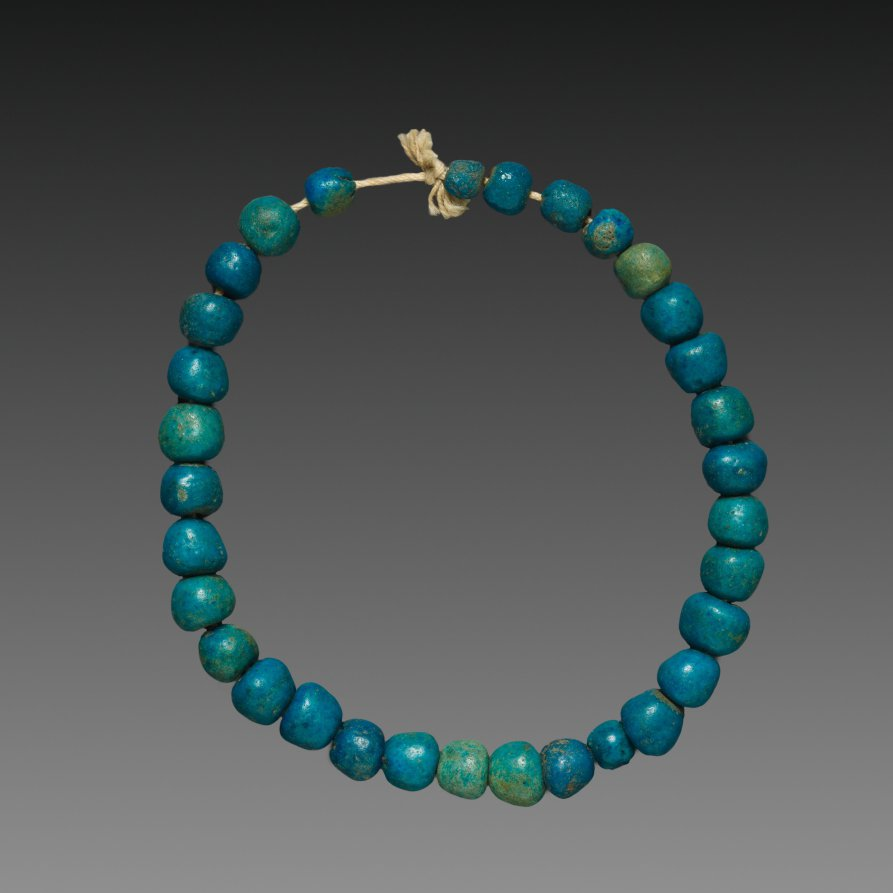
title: String of Beads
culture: Egypt, Middle Kingdom (2040–1648 BCE)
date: 1980–1801 BCE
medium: blue faience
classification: Jewelry